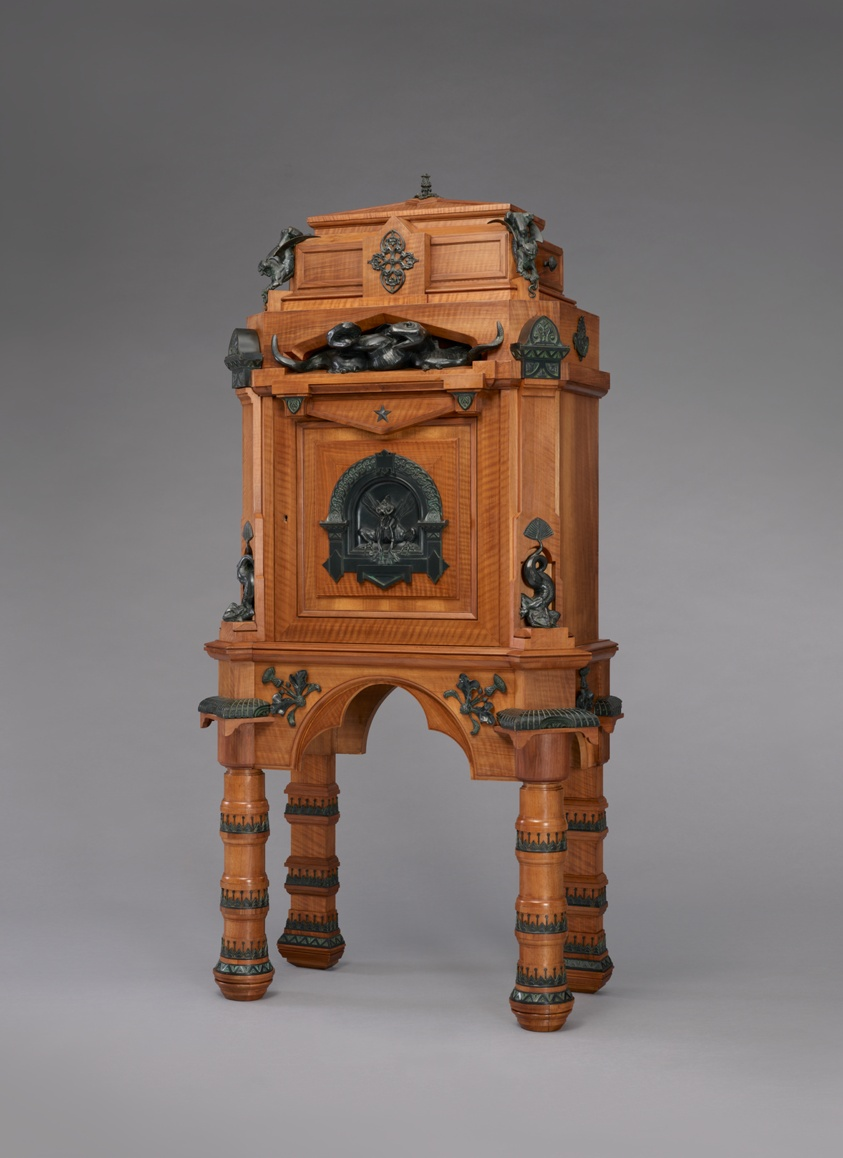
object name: Furniture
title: Cigar Cabinet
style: Neogothique, 19th century, gothic revival, merovingian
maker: Made by Charles-Guillaume Diehl (German, active in Paris, 1811–1885); Designed by Jean-Eugene Brandely (French, active 1867–1873); Bronzes modeled by Emmanuel Fremiet (French, 1824–1910); Paris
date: c. 1867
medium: Oak, cedar and walnut veneers, patinated bronze, and caning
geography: Paris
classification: furniture; humidor; european decorative arts; cabinet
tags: lizards, merovech, merovee, quatrefoil, smoking, cigars, tobacco